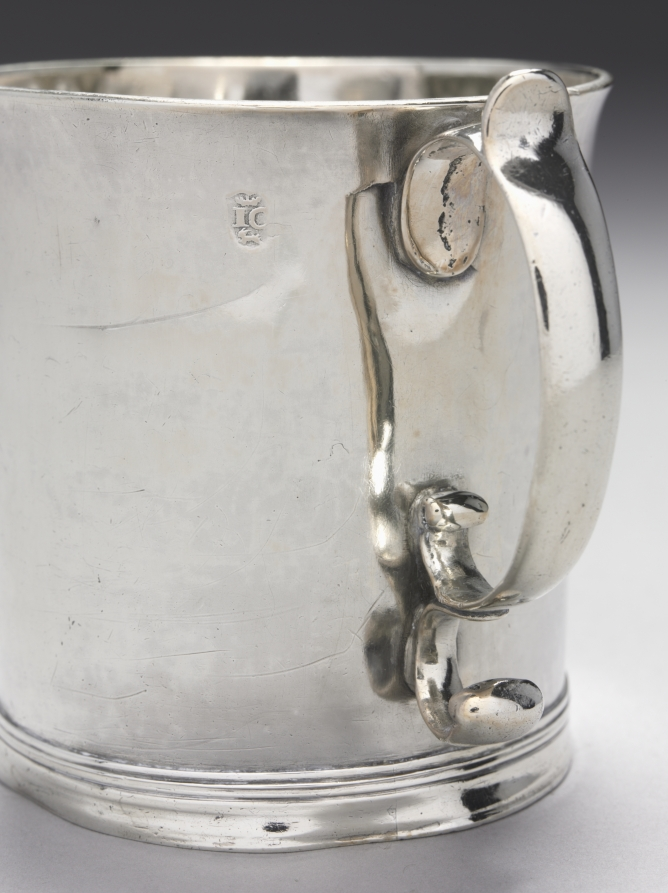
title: Mug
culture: America, Massachusetts, Boston, late 17th-early 18th Century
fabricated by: John Coney (American, 1656–1722)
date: 1680–1710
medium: silver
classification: Silver